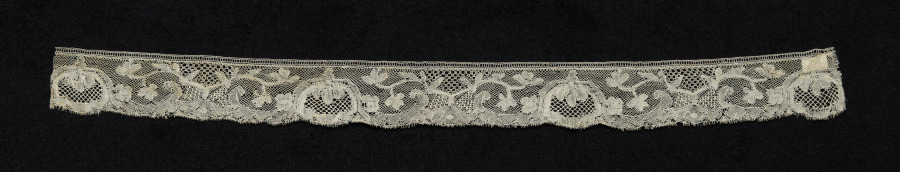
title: Lace Edging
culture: Belgium, Mechelen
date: 1700s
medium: Linen: bobbin lace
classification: Lace